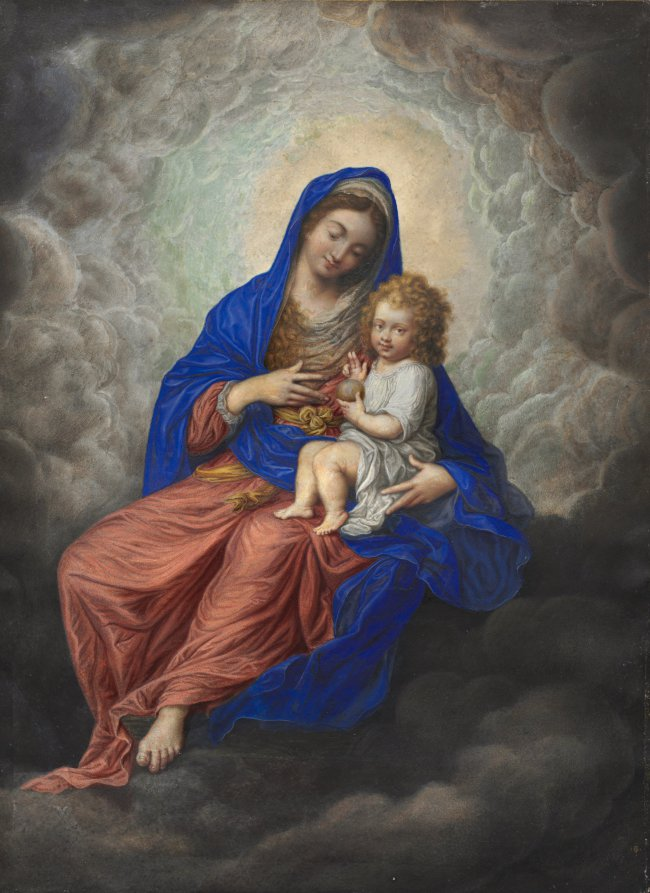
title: Madonna and Child in Glory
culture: England, 17th century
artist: Isaac Oliver (French, c. 1565–1617)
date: c. 1605–1617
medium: gouache and watercolor, heightened with gum arabic, with shell gold framing lines, on vellum, mounted on paper, vellum, and wood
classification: Portrait Miniature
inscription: signed with monogram in gold, lower right: "IO"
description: It is difficult to overstate the singularity of this work in 17th-century England. While the image has visual sources in works by Rubens and Federico Barocci, surely known to the cosmopolitan artist (who travelled to Italy, unusually for English artists at this moment), the object is iconographically unique. Oliver places a tender Virgin and Child (itself more closely linked to Catholic instead of Protestant imagery), in a heavenly, visionary setting, and incorporates the medieval iconography of the lactating Virgin with the Salvator Mundi, early Netherlandish in origin, but more commonly an Italian typology by the early seventeenth century.